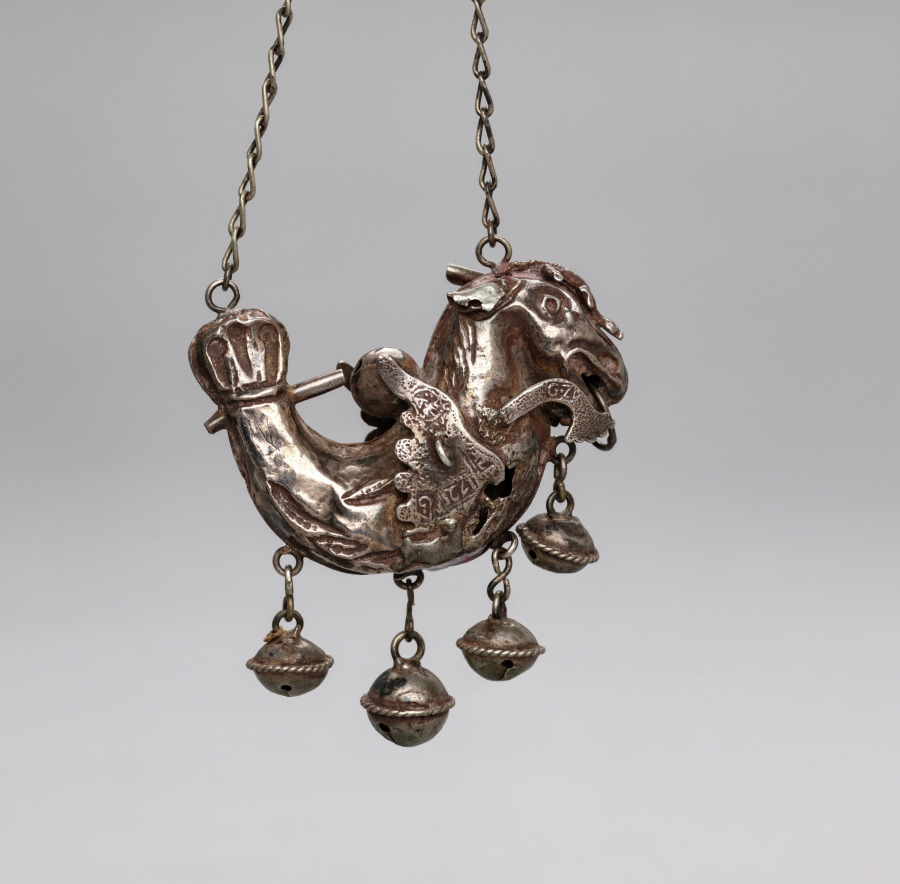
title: Rattle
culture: Italy, Sicily, 18th century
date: 1700s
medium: silver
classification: Silver